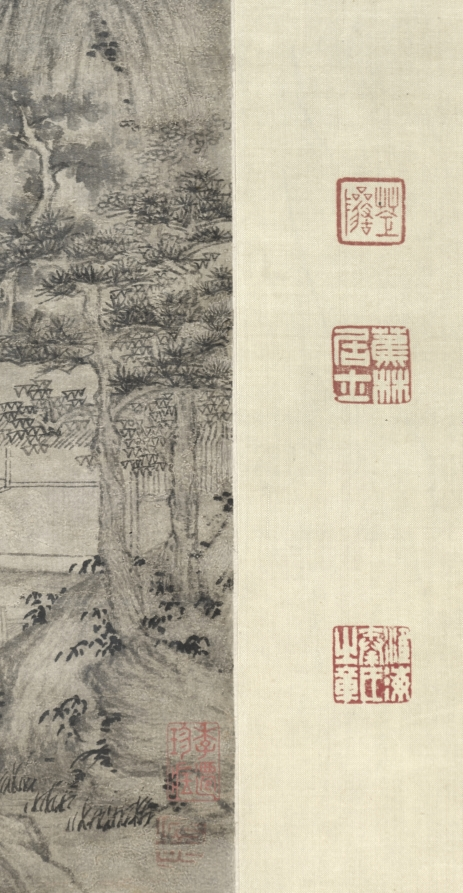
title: Streams and Mountains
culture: China, Yuan dynasty (1271-1368)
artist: Xu Ben (Chinese, 1335–1380)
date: 1372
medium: hanging scroll, ink on paper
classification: Painting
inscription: 綠樹黃鸝處處山， 偶從谿上看雲還。/ 人生未許全無事， 纔得登臨便是閑。 壬子七月十日徐賁為吉夫先生畫 並詩共上 [印] 幼文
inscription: Label on mounting probably by Liang Qingbiao 梁清標 (1620–1691).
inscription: 4 additional inscriptions and 9 additional seals: 1 poem of Xie Hui 謝徽 (c. 2nd half 14th c.); 1 poem and 1 seal of Gao Qi 高啟 (1336–1374); 1 poem and 1 seal of Lu Zhen 盧貞 (c. late 14th c.); 1 poem of Huang Zai 黃載; 3 seals of Liang Qingbiao 梁清標 (1620–1691); 1 seal of Wang Jiqian [C. C. Wang] 王季遷 (1907–2003); 3 seals unidentified.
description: Like many literati of the late Yuan and early Ming dynasties, Xu Ben was entangled with the perils of dynastic change as well as the ups and downs of his official career. It was mainly through the art of painting and poetry, as well as the ideal of reclusion, that he sought feelings of exhilaration and shared them with his friends. Xu created this monumental landscape during one of his periods of reclusion. His innumerable “hemp-fiber” texture strokes create a unifying rhythm among the towering mountains with tightly knit masses of rocks. Nestled among shady trees at the base of the mountain is a rustic retreat, which a scholar approaches on foot to visit with the hermit. Among the five inscriptions at the top of the painting is one by the artist himself. He dedicated the painting to someone named Jifu 吉夫 and recorded a poem in praise of mountains. Green trees, yellow orioles, everywhere are mountains; Aimlessly I return from the stream, where I watched the clouds. Man's life does not allow unbroken ease, But to be able to be high up in the mountain, this is leisure.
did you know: An attendant opens a reed gate to welcome the scholar with a walking stick approaching the rustic retreat.